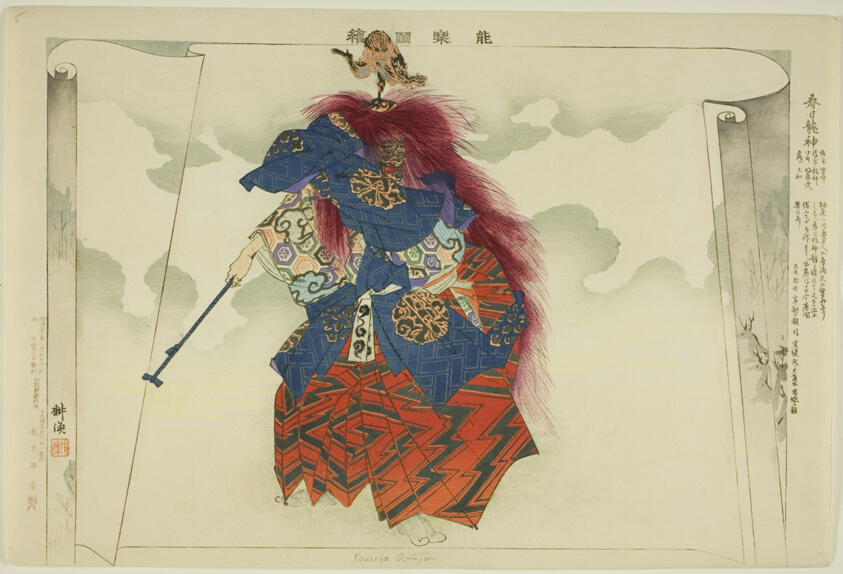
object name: Print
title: Kasuga Ryujin, from the series "Pictures of No Performances (Nogaku Zue)"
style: Japanese (culture or style)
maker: Tsukioka Kogyo; Japanese, 1869-1927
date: 1898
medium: Color woodblock print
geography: Japan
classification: woodblock print; print; asian art